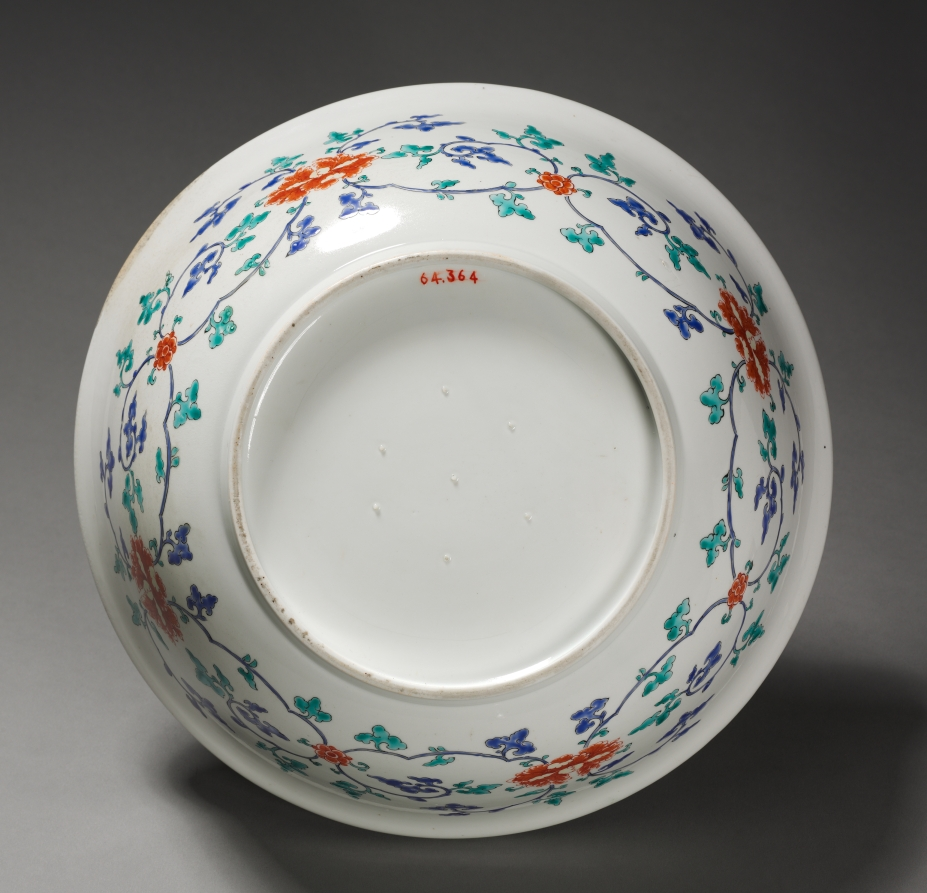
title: Bowl: Kakiemon Ware (1 of 2)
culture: Japan, Edo period (1615–1868)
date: late 1600s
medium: Imari ware porcelain with overglaze enamel and gold decoration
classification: Ceramic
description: The Chinese style of decoration identifies this bowl as a product made for the markets in England, Holland, France, and Germany. Here, kakiemon potters rearranged the Chinese literati motifs of the plum, pine, and bamboo. Such kakiemon ware inspired domestic porcelain production in Europe in the 1700s and 1800s.